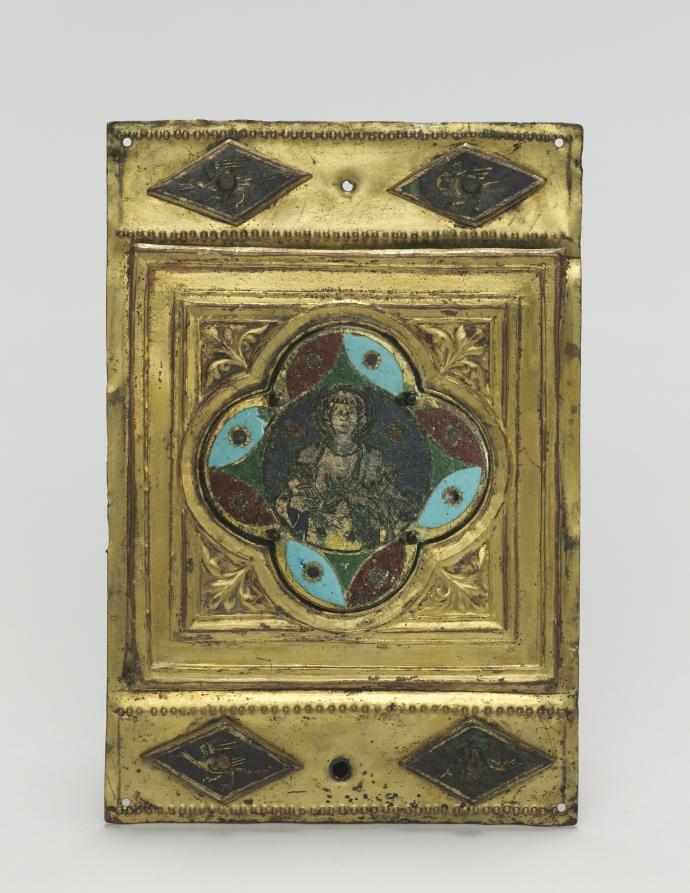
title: Ornamental Plaque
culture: Italy, Tuscany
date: c. 1380–1400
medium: champlevé enamel, glass paste stones, and gilding on copper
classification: Enamel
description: These plaques appear to have been part of a larger ensemble forming a band of decoration affixed to a church altar. Each plaque is decorated in multiple techniques-embossing, engraving, enameling, and gilding-to create a sumptuous visual effect.